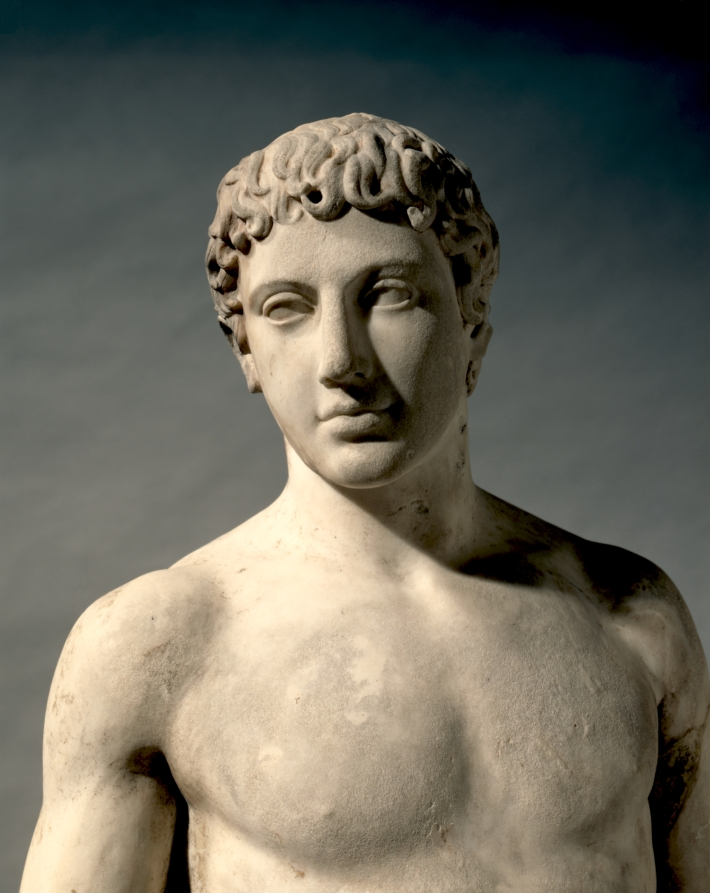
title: Statue of an Athlete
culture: Italy, Roman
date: 1–100 CE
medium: marble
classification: Sculpture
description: This idealized athlete recalls Greek sculptural types invented and popularized during the 400s BC. Large-scale athletes and other sculptures like this were originally created by famous artists as sanctuary dedications. Centuries later, they were widely copied and adapted by Roman sculptors, whose clients sought their own versions of earlier masterpieces. Working in marble rather than bronze, these sculptors added certain elements for stability, such as the struts and the large tree trunk beside the right leg here. Sculptures like this one are profoundly complex, made by and for Romans but descended from Greek ancestors.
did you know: For many years, this sculpture stood in the rotunda of the Cleveland Museum of Art.